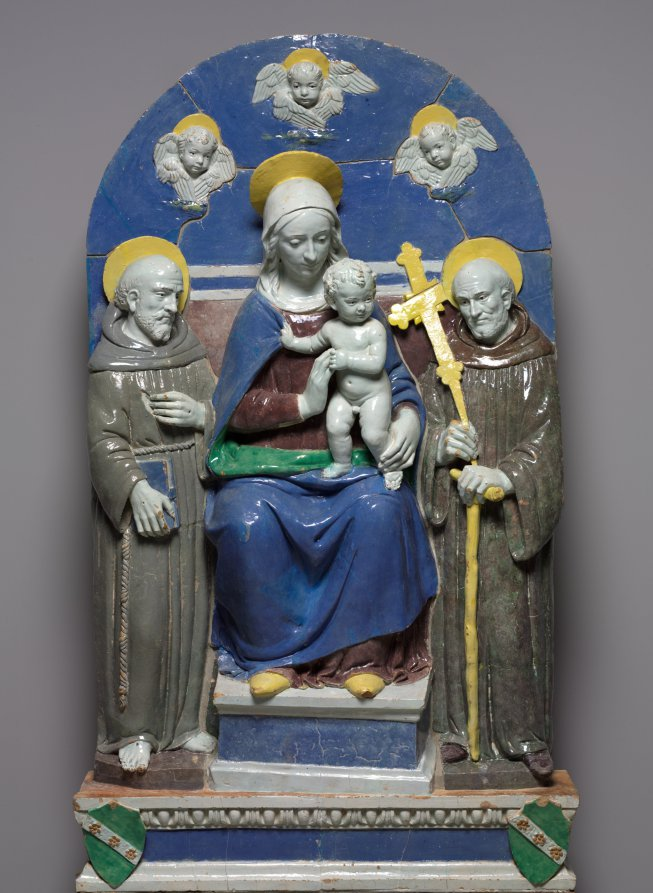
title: Virgin and Child Enthroned with Saints Francis and Giovanni Gualberto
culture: Italy, Florence, 16th century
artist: Benedetto Buglioni (Italian, 1461–1521)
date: c. 1510–20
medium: glazed terracotta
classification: Sculpture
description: The Madonna sits upon a throne with the Christ child standing on her knee. He is steadied by his mother, turning delicately to grasp her robe for support. On the left is Saint Francis, identified by his stigmata. On the right, Saint Giovanni Gualberto is identified by his monk's robe and distinctive processional cross. The brown robes of the saints, the purple of the Virgin's tunic, and the flesh tones of the figures contrast strongly against the bright blue background. In the semicircular sky behind the figures, three winged cherub heads emerge, representing a host of angels. Glazed terracotta is both durable and decorative and the gleaming white of this piece would have stood out in the darkness of a church. The medium was made popular by Renaissance artist Luca della Robbia and came into fashion as a substitute for expensive carved marble. A rounded arch frame embellished with fruit and flower garlands as well as egg-and-dart and cord moldings accompanied the work when it was acquired, but was later determined not to be original and removed. Buglioni's work bears the influence of the della Robbias, particularly in the simple color scheme. Buglioni likely worked in the studio of Luca's nephew, Andrea, where he would have learned the technique of glazing terracotta.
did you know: The unusual purple hue is particular to the artist.